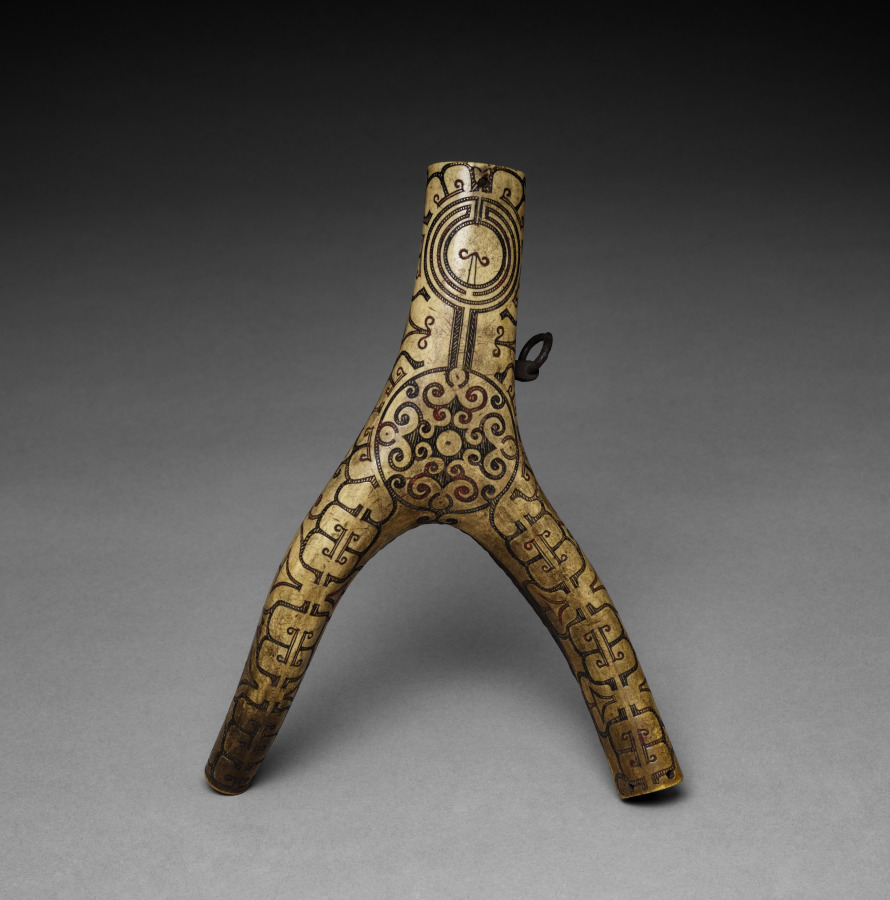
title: Powder Flask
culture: Transylvanian, late 17th-early 18th century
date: c. 1675–1725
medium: staghorn (two branches) with incised and painted geometric decoration; mounts missing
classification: Arms and Armor